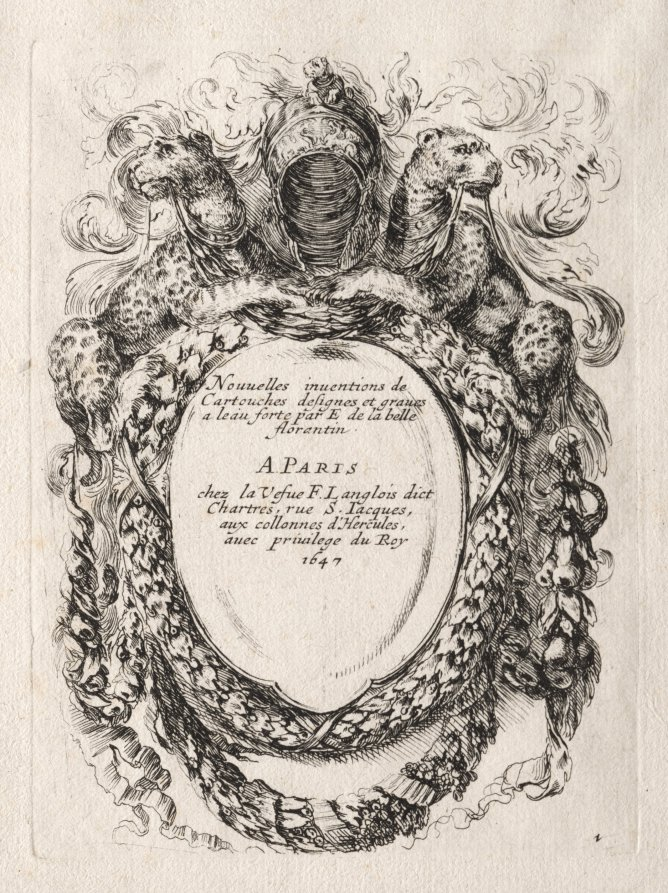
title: New Model for a Cartouche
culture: Italy, 17th century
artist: Stefano Della Bella (Italian, 1610–1664)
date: 1647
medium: etching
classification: Print